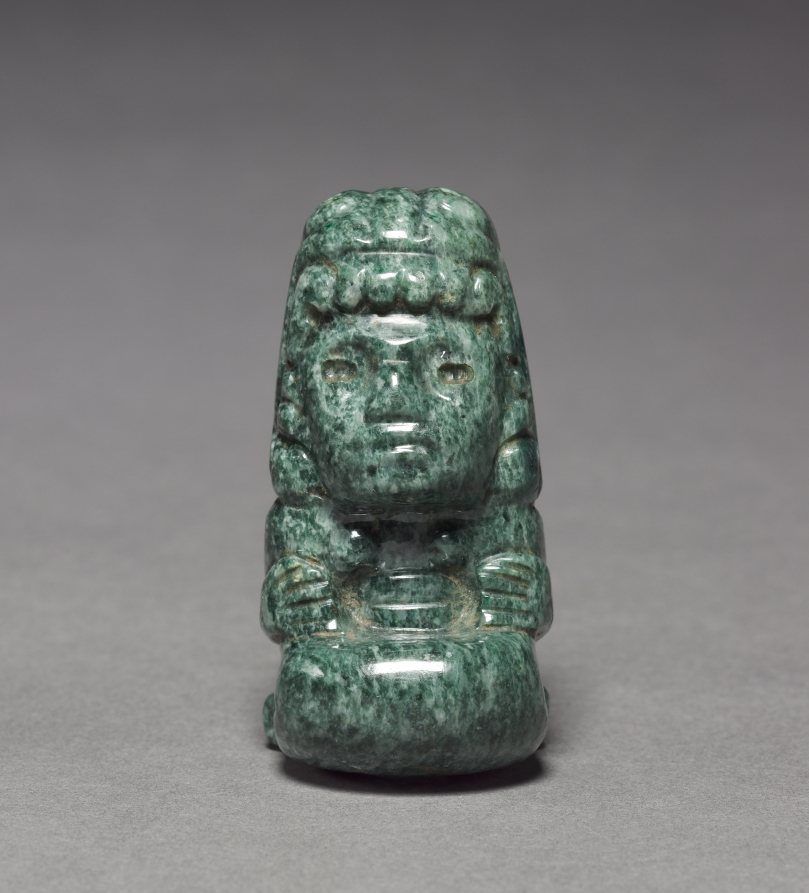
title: Female Figurine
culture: Central Mexico, Aztec, Post-Classic Period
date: 1325–1519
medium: jadeite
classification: Stone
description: Seated in typical female posture, this figurine probably represents an Aztec goddess or ritual impersonator. She wears a monster headdress, but her costume is simple, making specific identification difficult.